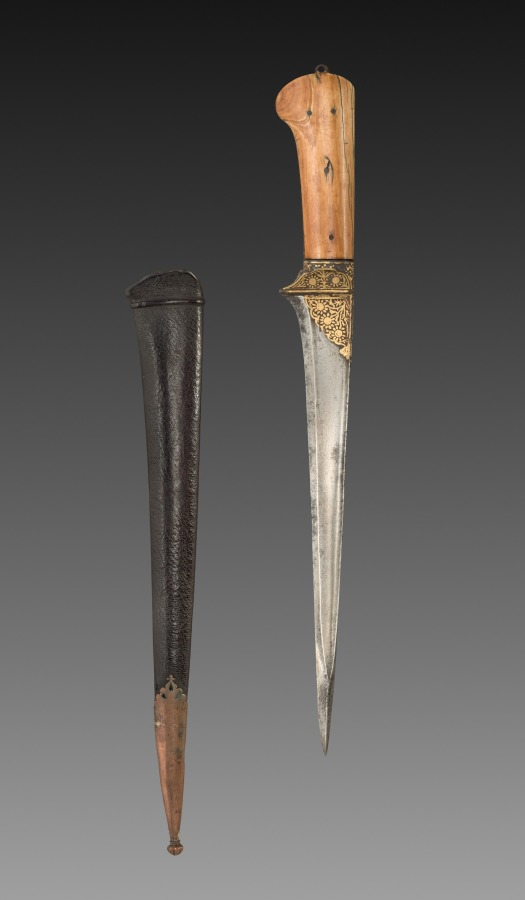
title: Dagger with Brown Leather Case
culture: India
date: 1700s–1800s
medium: silver inlay and leather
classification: Arms and Armor